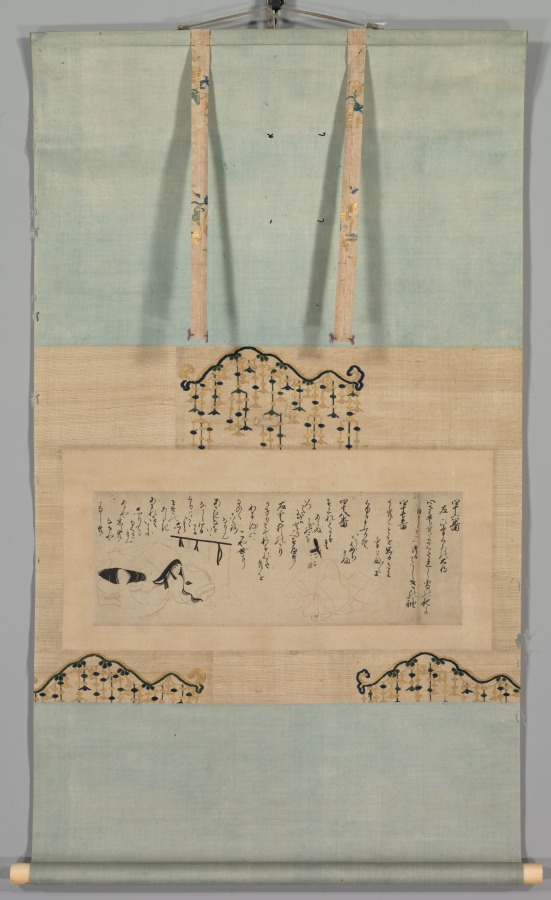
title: Section of an Illustrated Tale of Genji Poetry Contest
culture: Japan, Muromachi period (1392–1573)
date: 1400s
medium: section of a handscroll mounted as a hanging scroll; ink on paper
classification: Painting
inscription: 四十六番 左 ひげくろの大将 心さえ空にみだれし雪の［も」夜に ひとりさえつるかたしきの袖／ 四十七番 うきことを思ひさわ げばさまざまに くゆるけむりぞ いとど たち そふ／ 四十八番 すがくれてかず にも あらぬ かりのこを いづかたにかはとりかくすべき／ 右 雲井のかり かぎりとてわすれがたきを わするるも こや世に なびくこころな るらむ／ あさきなを いひ ながしける かわ ぐちは いかが もらしし せきのあらがき／ あわれをもいかに しりてか なぐさ めむ あるや 恋しき なきや かなしきに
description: This hanging scroll was once part of a handscroll depicting a waka (thirty-one syllable verse) poetry contest between characters from the 11th-century literary classic Tale of Genji. In this section, a woman known informally as Kumoi no kari, or “Goose in Fog,” after a lovelorn line she hums in the novel, is pitted against Higekuro no taishō, or “General Blackbeard.” Three of his poems, numbered 46 to 48, from “The Handsome Pillar” chapter appear over his image. The subsequent three poems inscribed above Kumoi no kari are presented as her “responses,” and come from "The Plum Tree Branch", “New Wisteria Leaves”, and "Evening Mist" chapters.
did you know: General Blackbeard laments having smelly ash poured upon him by his angry wife in one of the poems.